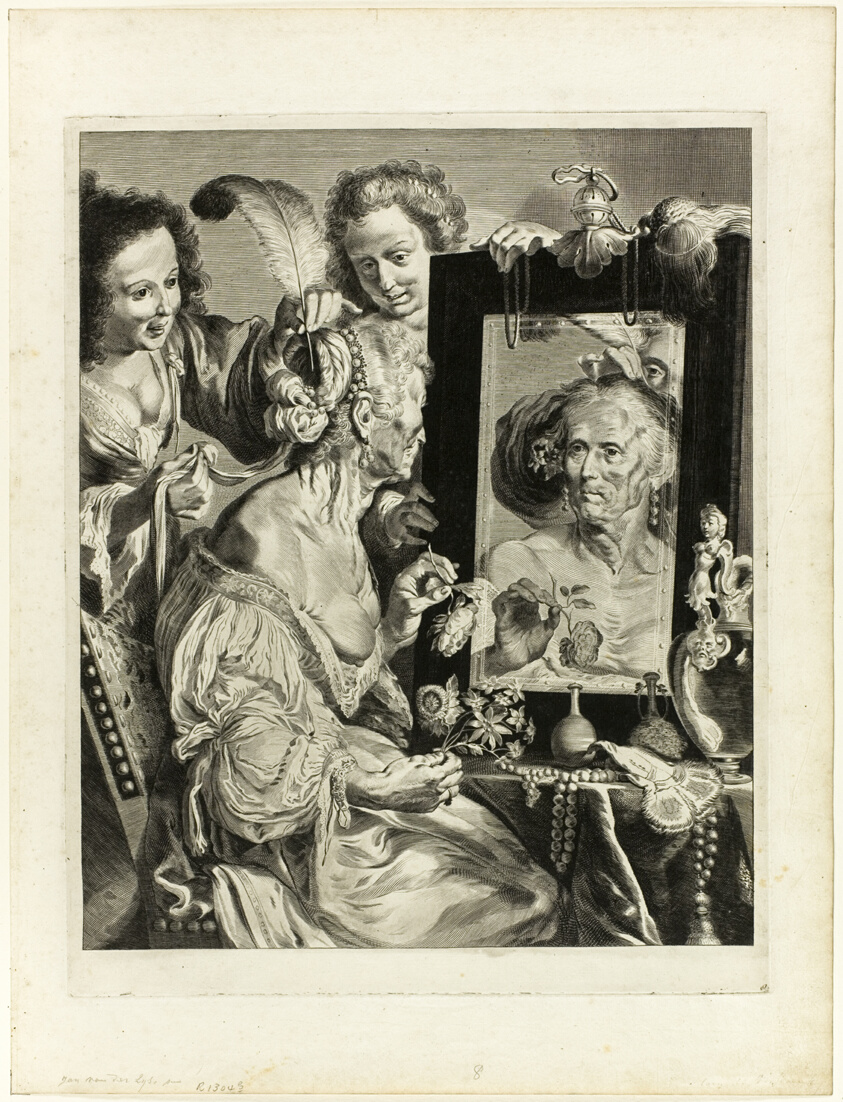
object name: Print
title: The Old Coquette, from Cabinet Reynst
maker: Jeremias Falck (Polish, c. 1610-1664/77); after Bernardo Strozzi (Italian, 1581-1644)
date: c. 1655-58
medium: Engraving on cream laid paper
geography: Poland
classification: engraving; print; prints and drawing